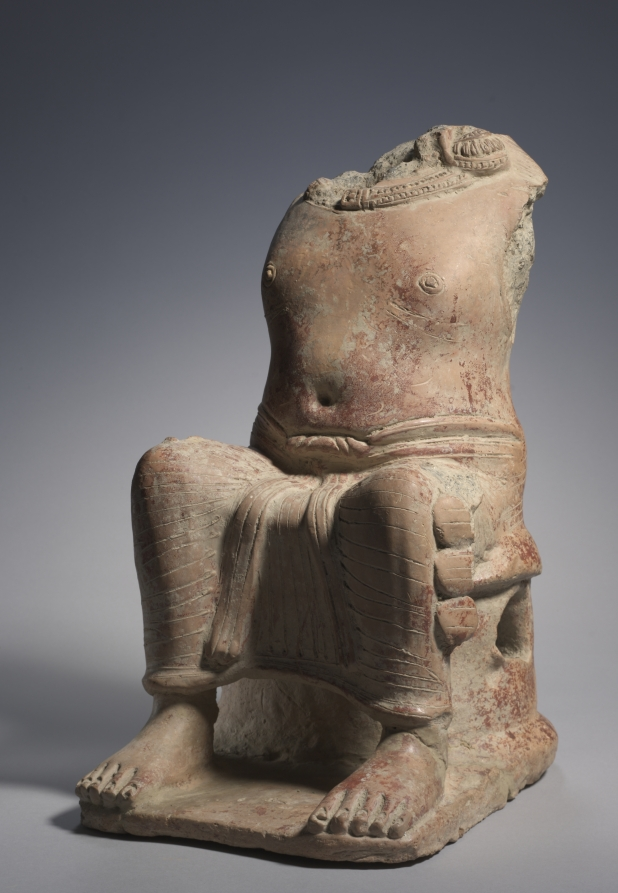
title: Seated Yaksha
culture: Northern India, Uttar Pradesh, probably Kaushambi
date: 300s CE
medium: terracotta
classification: Sculpture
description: The power and frontality of this figure, whose bare feet are planted firmly on the ground, along with the corpulence of his protruding belly, suggest that the image may represent Kubera, or a yaksha worshiped for wealth and prosperity. Terracottas of large size like this one were usually modeled freely and incised with a wire tool.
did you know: The figure wears a heavy, short necklace and originally wore earrings, of which only the left one remains.